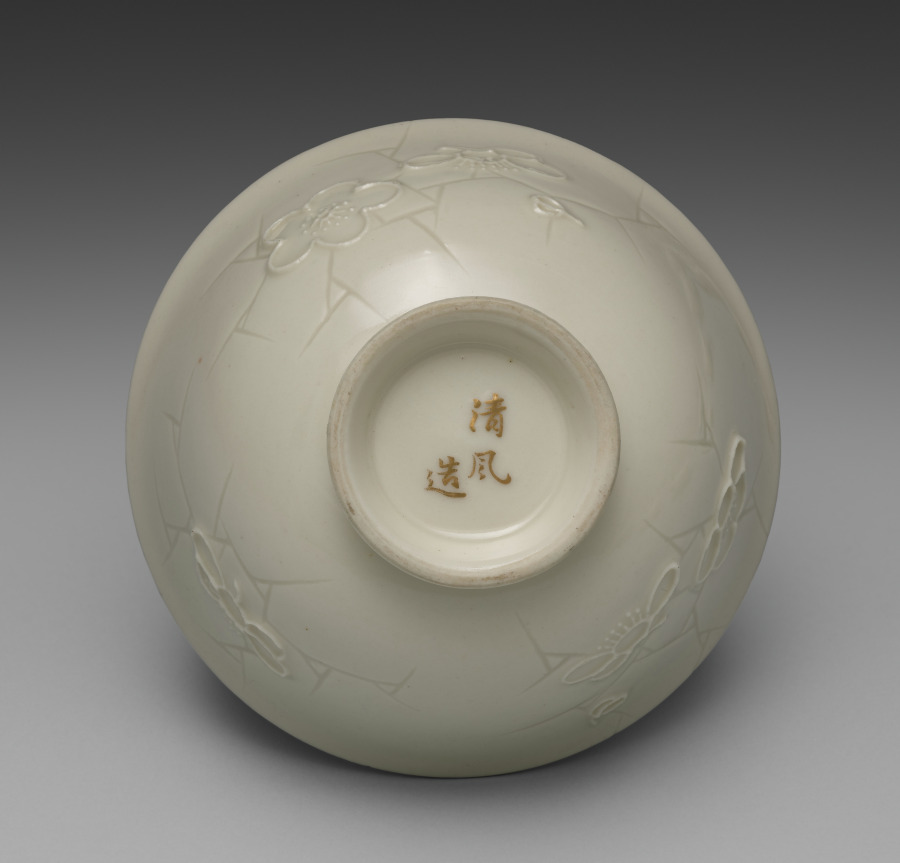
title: Bowl from Dining Set with Plum Blossoms and Cracked-Ice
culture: Japan, Meiji period (1868–1912)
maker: Seifū Yohei II (Japanese, 1844–1878)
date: c. 1875–78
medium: Porcelain with molded designs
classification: Ceramic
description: Each item in this set has a delicate low-relief design of flowering plum branches over scattered, intersecting lines meant to resemble the cracked-ice surface of a frozen body of water and is signed on the base in gold pigment. While Yohei II produced many fine works in underglaze blue, like those produced by Kiyomizu Shichibei, he also made works in quite different styles later in his career, from the early 1870 s. In 1873, he was appointed purveyor to the Industrial Center of Kyoto Prefecture, a designation associated with Kyoto’s efforts to reach an international market through the port of Kobe; and from 1875 until his death, he was involved in national-level projects to present Japanese ceramics across the world. It was during this period that Yohei III was apprenticed to Yohei II, and it has been suggested that this set may in fact be an early example of Yohei III’s work, which he signed with his teacher’s name. Decorated with flowers resembling Japanese textile motifs, the set calls to mind the design of Yohei II’s pair of vases with plum blossoms in the Victoria and Albert Museum. Here, the elaborate trees created for a formal public exhibition setting have been translated into the approachable blossoms of the genteel domestic environment. While the designs are consistent across the pieces, each raised flower petal and pistil and each incised line in the ice was done by hand, so the cups, bowls, and dishes are similar yet unique. The bottoms of two boxes once identified the set’s owner, but the information has been deliberately obscured with black ink. However, inscriptions still visible appear to indicate two occasions, once at the end of July 1886 , and once again in June 1916 , when parts of the set were requested from Hokura in Niigata Prefecture. The location corresponds to a neighborhood in the present-day city of Jōetsu. The surname Tsuji 辻 also appears on a paper tag affixed to one of the box cloths. Future research may possibly reveal more about their provenance. A vase by Yohei III in a private collection combines the formal grandeur of the Yohei II vases in the Victoria and Albert Museum with the gentler design of this dining set, placing flowering plum trees against soft, scalloped-edge clouds resembling those in golden screens.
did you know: The dining wares have a creamy white coloration that the four boxes containing them identify as Korean in style.